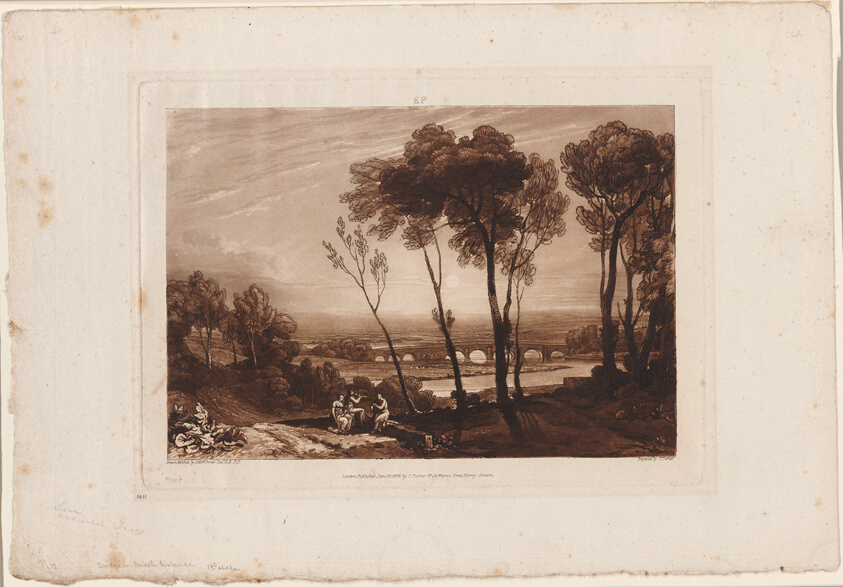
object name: Print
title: The Bridge in Middle Distance, plate 13 from Liber Studiorum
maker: Joseph Mallord William Turner (English, 1775-1851); Engraved by Charles Turner (English, 1773-1857)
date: published June 10, 1808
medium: Etching and engraving in brown on ivory laid paper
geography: England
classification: etching; print; prints and drawing